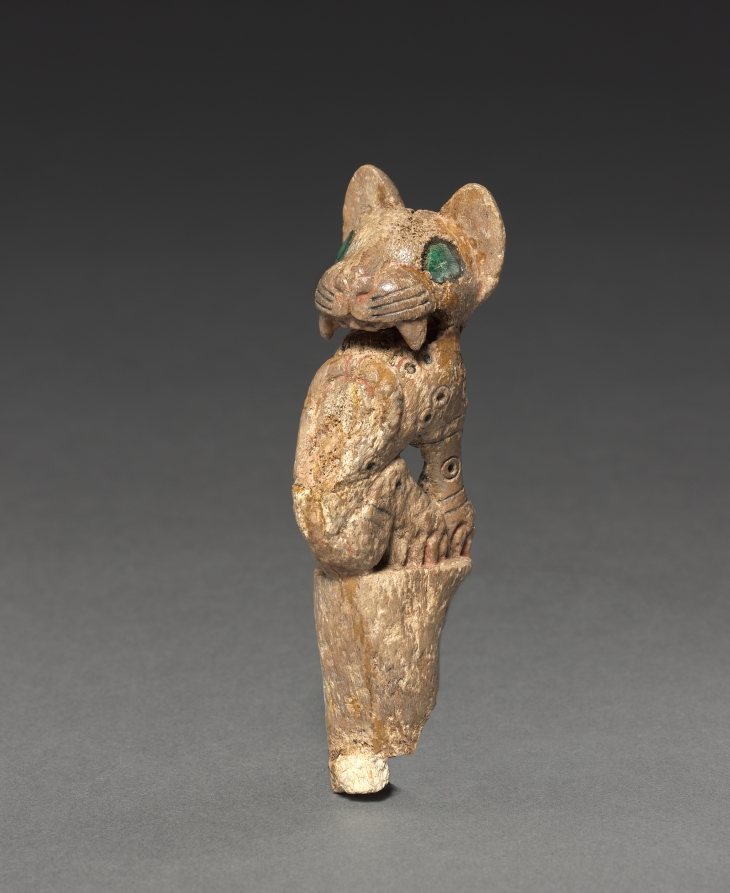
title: Handle of a Throwing Stick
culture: Peru, South Coast, Tiwanaku style, 400-1000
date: c. 700–900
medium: bone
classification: Arms and Armor